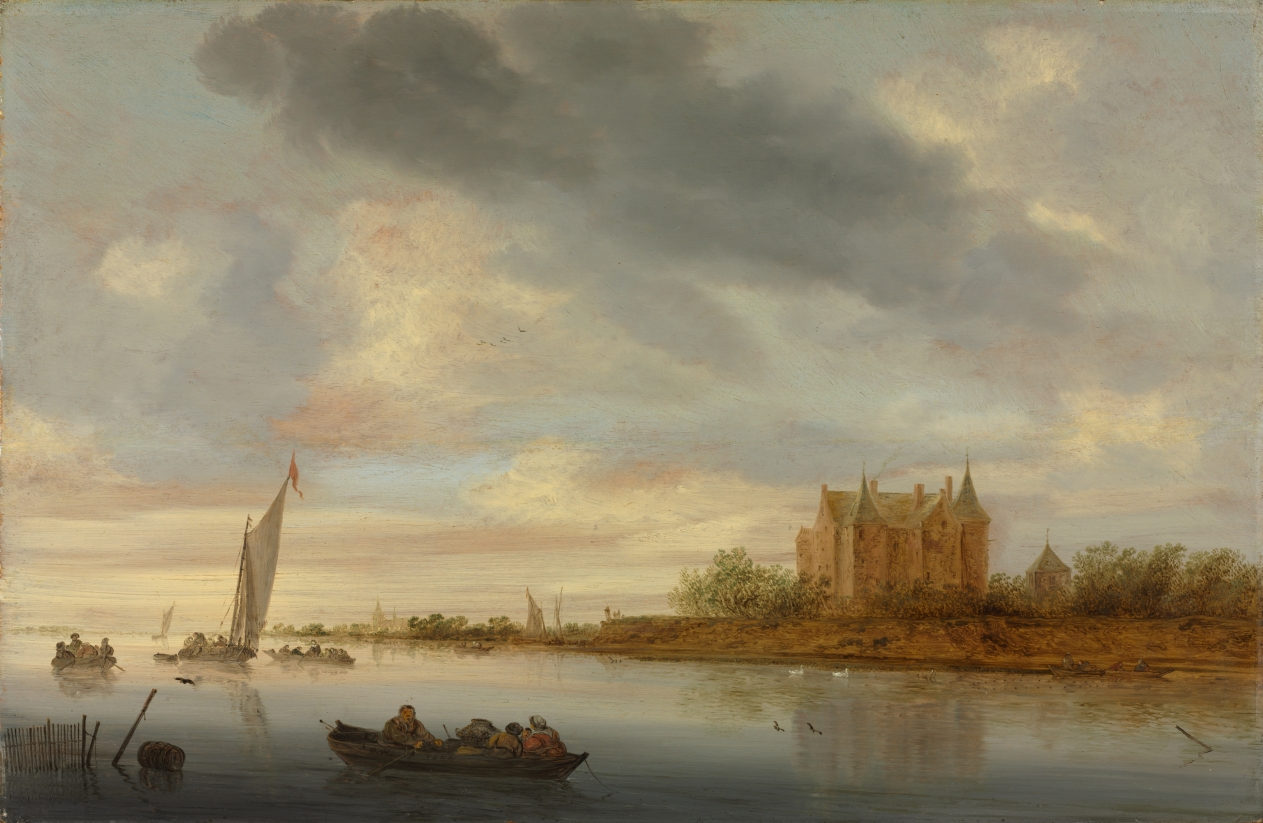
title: Castle on a River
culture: Netherlands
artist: Salomon van Ruysdael (Dutch, 1602–1670)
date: 1644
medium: oil on wood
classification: Painting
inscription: Signed lower left on boat: "S.VR / 1644 (VR in monogram]"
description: Salomon van Ruysdael, the uncle of Jacob van Ruisdael, here represents a free interpretation of the Castle Loevenstein. In addition to its picturesque qualities, the castle had great political and cultural importance as the official state prison and a key fort in the southern Netherlands. Painted just before the Dutch won independence from Spain in 1648, the painting likely expressed nationalist pride for its owner.